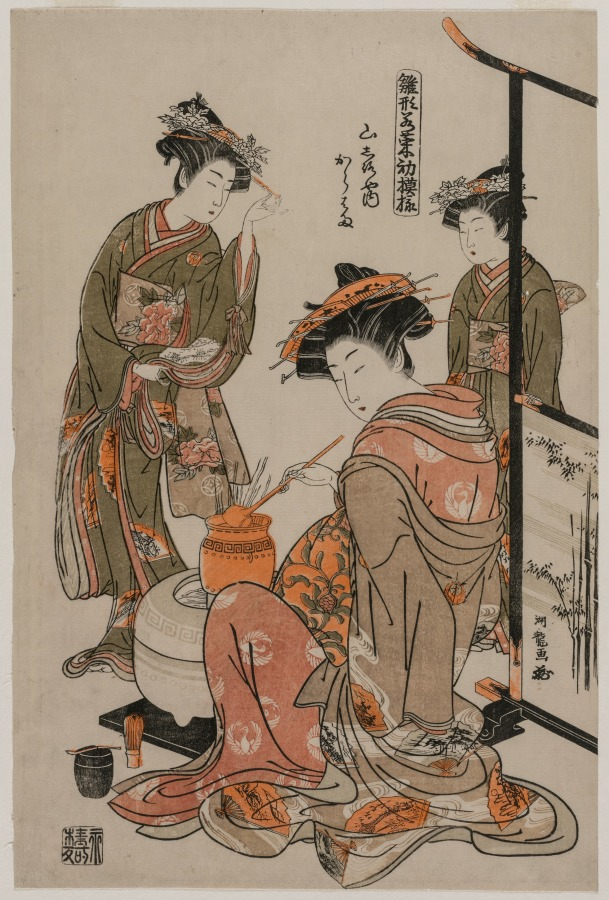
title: The Courtesan Karahama of Yamashiroya Performing the Tea Ceremony (from the series Models for Fahions: New Designs as Fresh as Young Leaves)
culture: Japan, Edo period (1615–1868)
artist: Isoda Koryūsai (Japanese, 1735–1790)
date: late 1770s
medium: color woodblock print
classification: Print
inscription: Signature: Koryu ga Artist Seal: kakihan Publisher: Nishimuraya Yohachi (Eiju han)